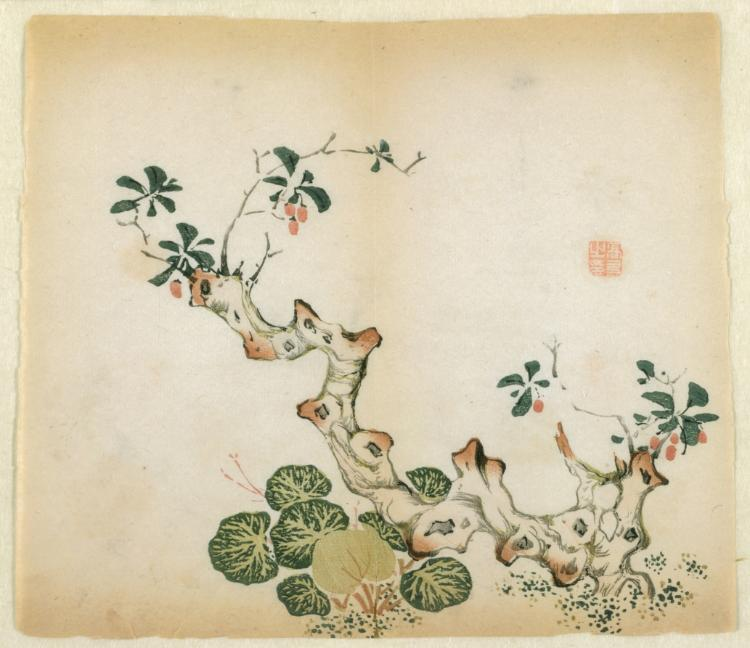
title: Branching Stump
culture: China, Ming dynasty (1368-1644) or later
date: 1368–1644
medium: color woodblock print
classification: Print